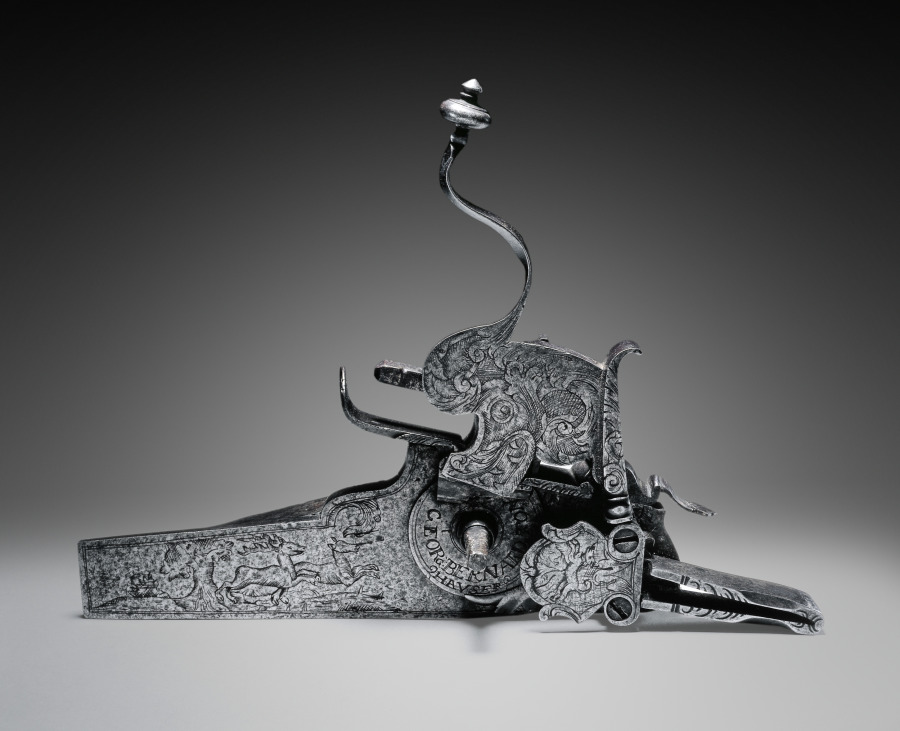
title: Wheel-Lock from a Hunting Gun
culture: Germany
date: 1600s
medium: steel, engraved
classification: Arms and Armor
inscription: on lock: Georg Bernardton Hauser; on plate behind hammer: In Schromn (?) Hauser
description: This wheel-lock mechanism is engraved with a stag and a hound. Images of "the chase" were obviously popular themes on weapons intended for hunting. The name of the locksmith, Georg Bernardton Hauser, can be seen on the wheel.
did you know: Engraving, one of the oldest techniques for decorating metal objects, was frequently used to embellish the metal parts of high quality firearms.